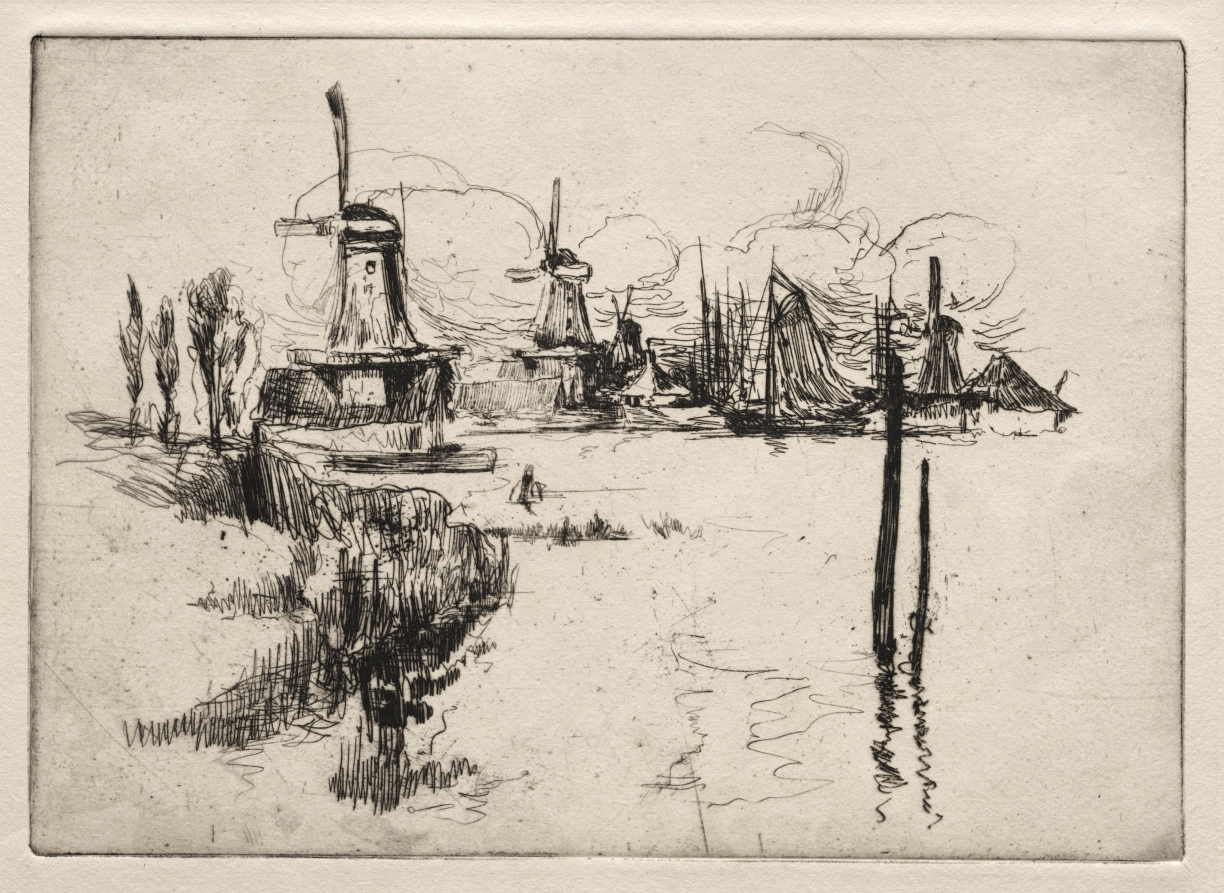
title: Dordrecht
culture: America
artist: John Henry Twachtman (American, 1853–1902)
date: c. 1885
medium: etching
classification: Print